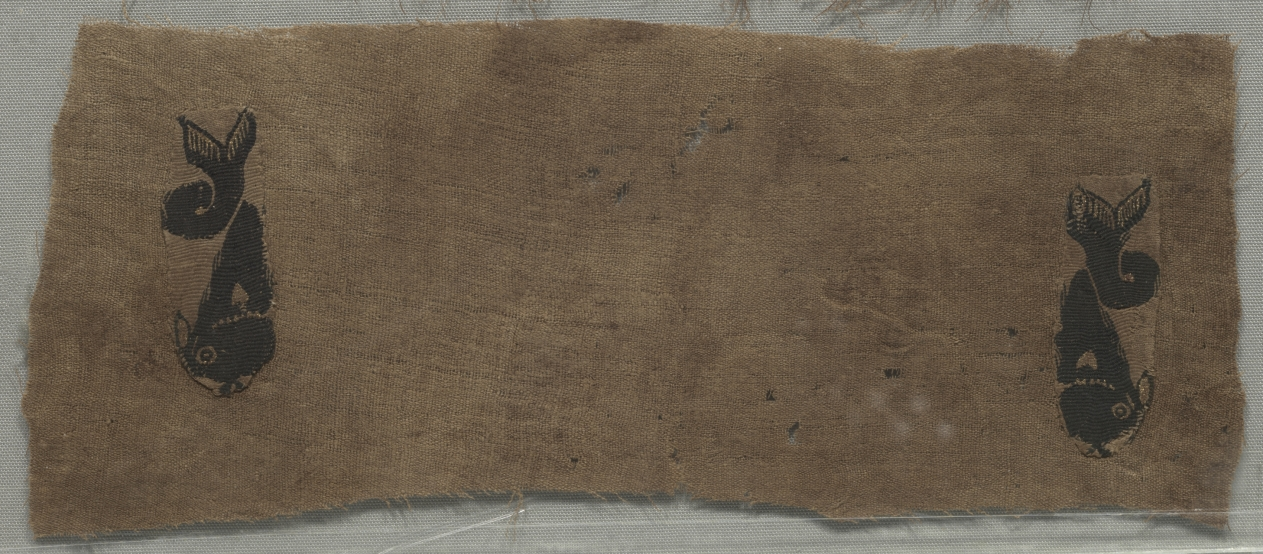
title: Two Fragments from a Curtain: Dolphins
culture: Egypt, Byzantine period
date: 400s - 500s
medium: tapestry (originally inwoven in tabby ground); wool, linen and gold filé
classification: Textile